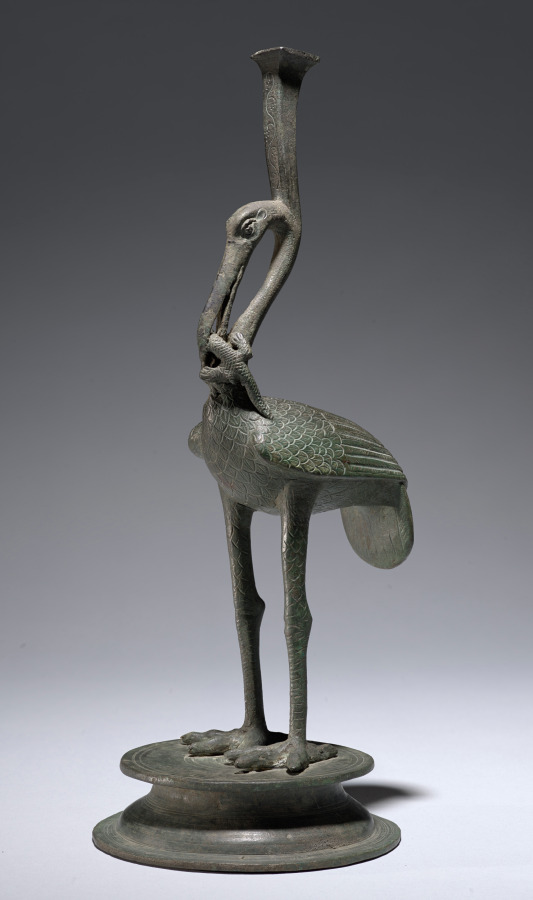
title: Ibis Eating a Lizard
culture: Italy, Rome, Roman Empire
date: 100 BCE–100 CE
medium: bronze, hollow cast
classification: Sculpture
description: The ibis is an Egyptian bird, shown here standing firmly on both legs with a lizard in its beak. The bird rests on a two-tiered circular base, and a vertical stem with incised decoration extends above the ibis’s head. While an Egyptian animal, the image of the ibis devouring a lizard became common only in the Roman world, depicted in wall paintings and seen on Barbotine ware, a type of pottery. This sculpture may be unique, however, in showing this motif in the round.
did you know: This sculpture was possibly used as a support for furniture, a candelabrum, or an incense burner.